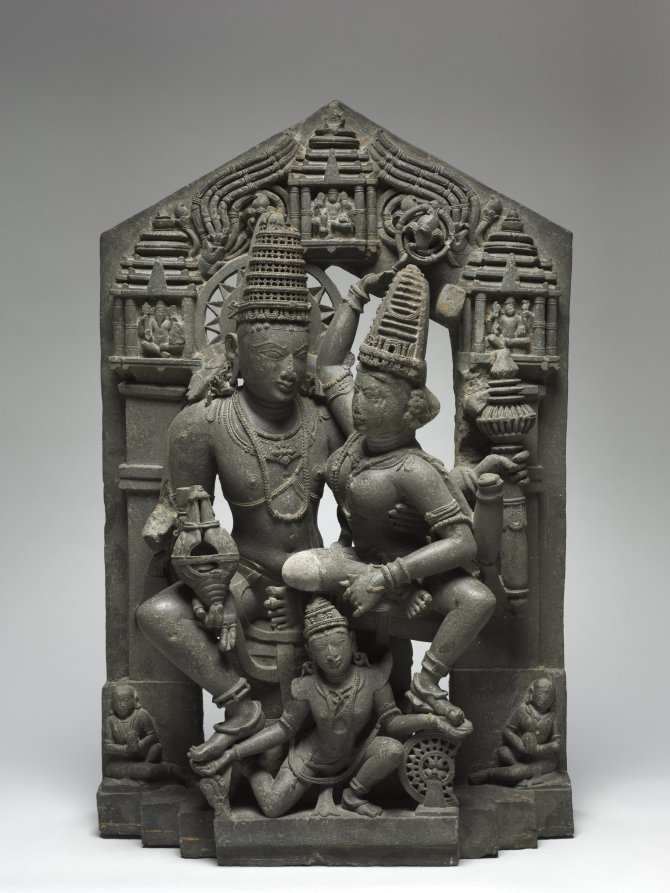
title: Vishnu and Shri Supported by Garuda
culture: Western India, Karnataka, 11th-12th century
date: 1000s-1100s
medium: volcanic Deccan trap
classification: Sculpture